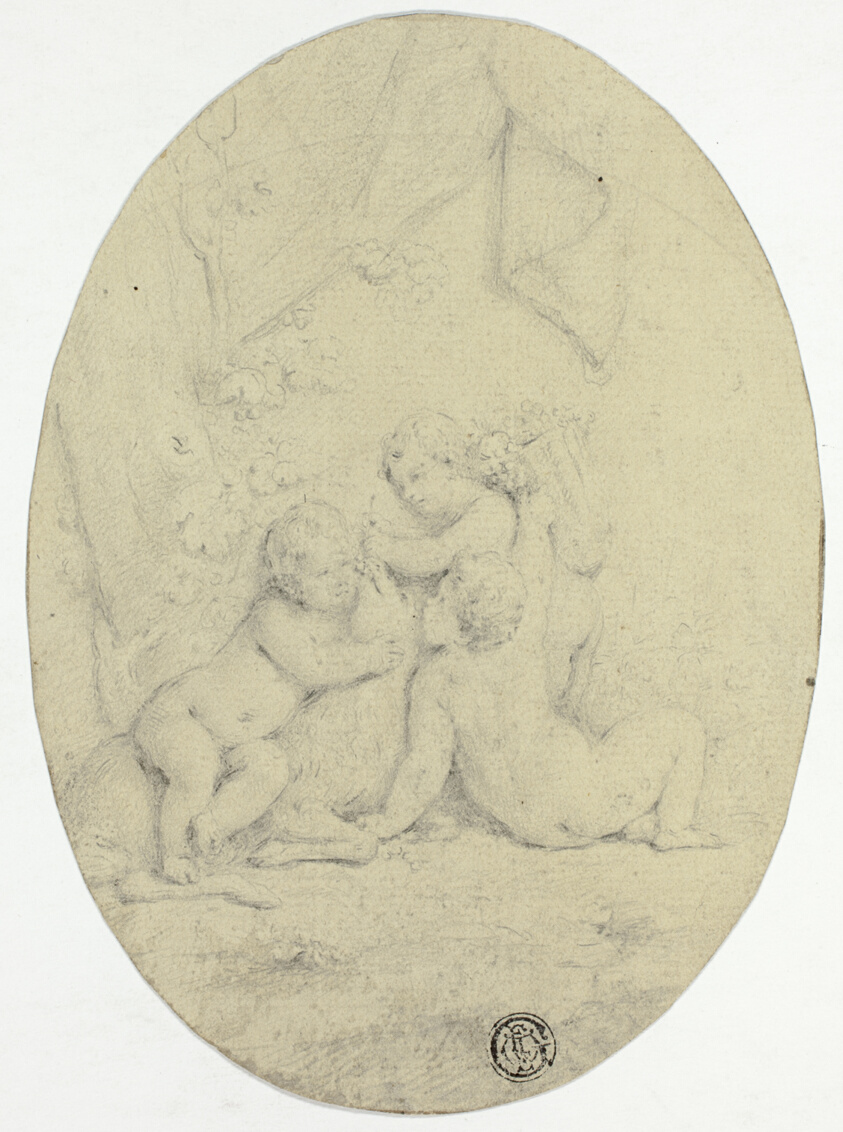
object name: Drawing and Watercolor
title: Three Children and a Goat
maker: Style of Jacob de Wit (Dutch, 1695-1754)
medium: Graphite, with touches of black chalk, on oval cream laid paper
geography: Holland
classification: graphite; drawings (visual works); prints and drawing